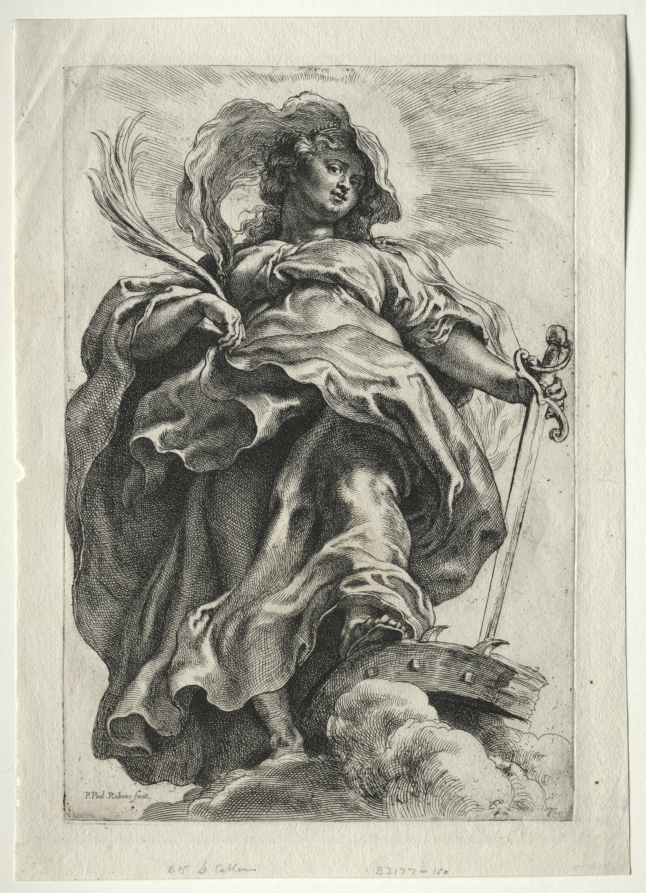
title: Saint Catherine in the Clouds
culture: Flanders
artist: Peter Paul Rubens (Flemish, 1577–1640)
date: 1620–30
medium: etching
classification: Print